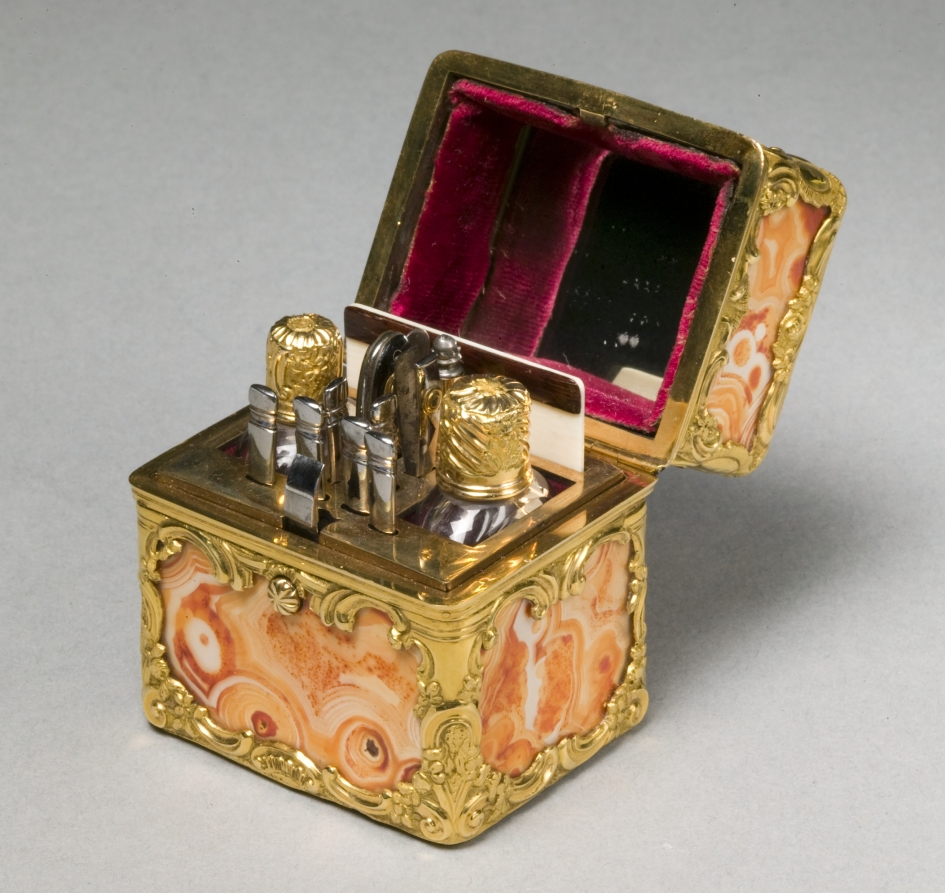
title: Vanity Set (Nécessaire)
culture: England, mid 18th century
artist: manner of James Barbot (British)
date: c. 1760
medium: gold, agate, interior fitted with implements, mirror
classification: Miscellaneous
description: Luxurious personal objects were an essential part of a privileged wardrobe during the 1700s and early 1800s, emphasizing their owner’s refinement and wealth. Jewelry, miniatures, and nécessaires—small expensive sets designed to hold grooming, writing, and sewing tools—were often given as intimate gifts, intended to be seen and admired. Their glittering surfaces, however, disguised a system based on the labor and suffering of enslaved or indentured people, whether in gold and stone mines or shops where these goods were made.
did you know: This small box with a mirror-lined lid is a dressing table accessory for travel that contains luxury objects such a clasp knife, tweezers, manicure set, and scent bottles.